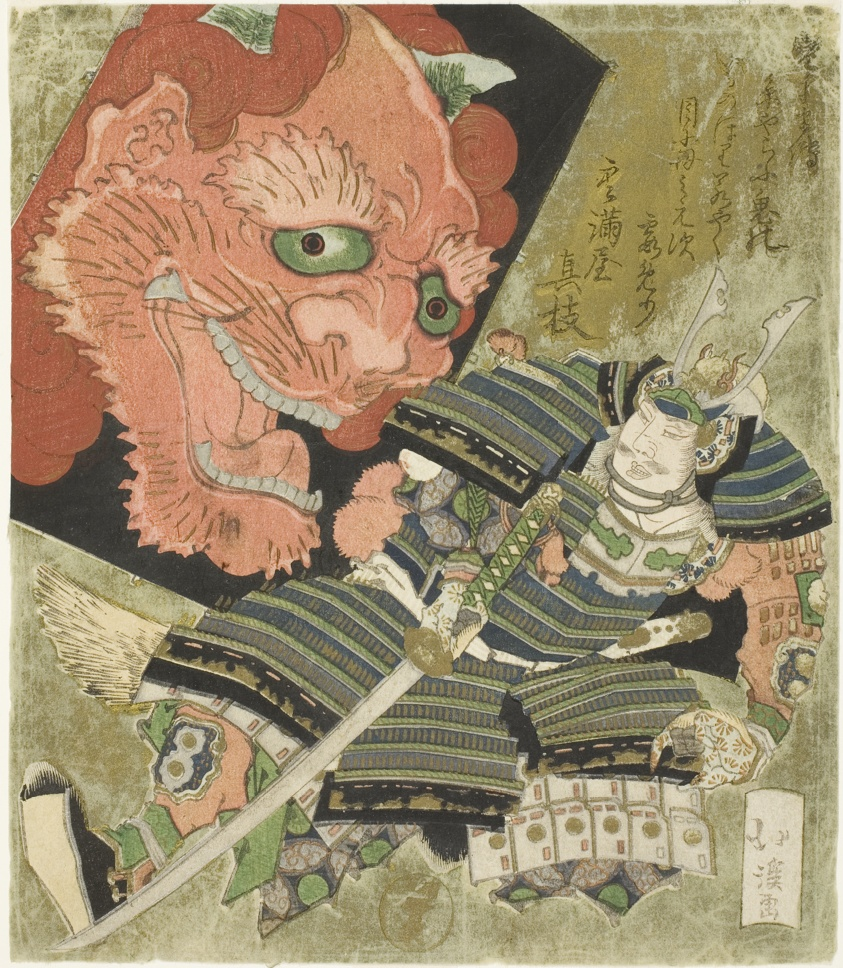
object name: Print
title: Raiko (Minamoto no Yorimitsu) and the demon kite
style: Japanese (culture or style)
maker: Totoya Hokkei (Japanese, 1780-1850)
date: c. 1825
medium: Color woodblock print; shikishiban surimono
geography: Japan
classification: woodblock print; print; asian art